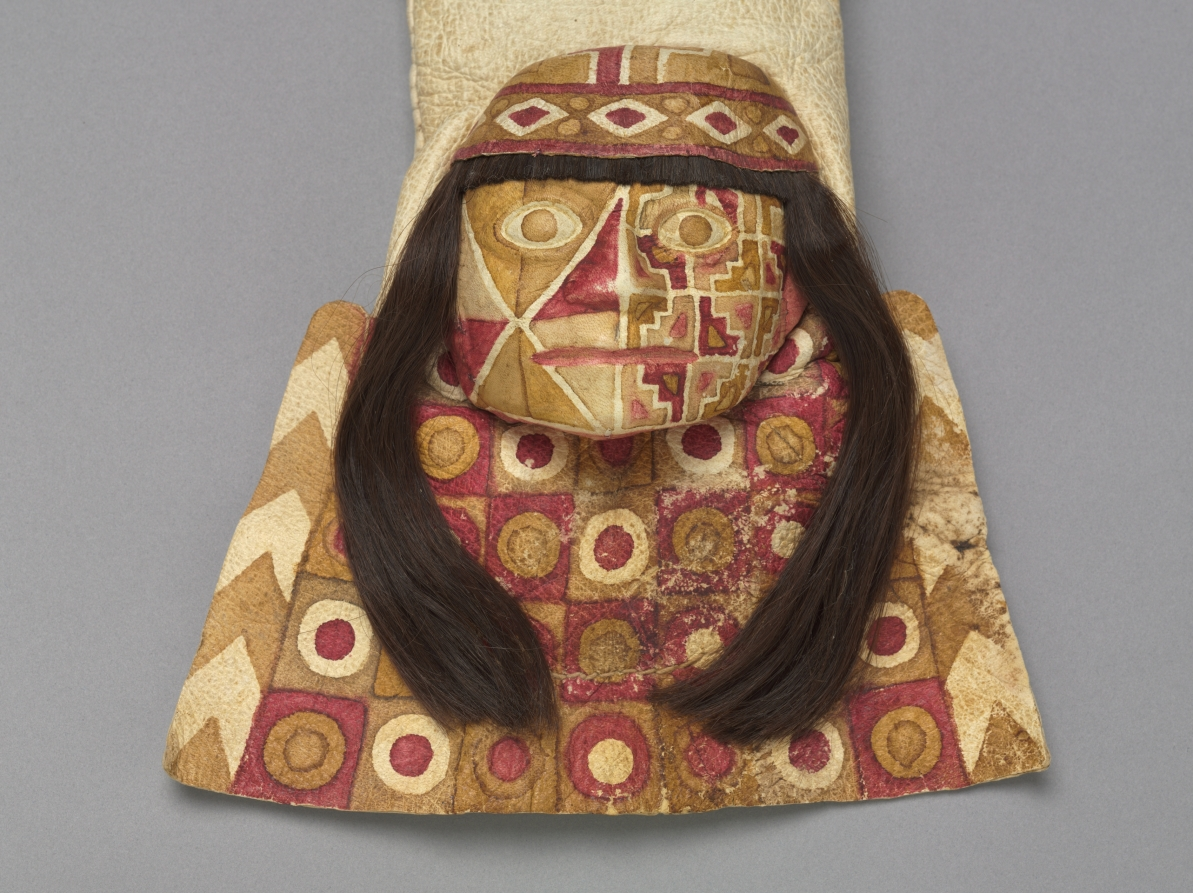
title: Bag with Human Face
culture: Andes, Wari, Middle Horizon, 6th-10th century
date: 600–1000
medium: alpaca or llama hide, human hair, pigment, cotton; coca leaf contents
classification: Mixed Media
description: The face on this bag is decorated with geometric designs that also appear on Wari warrior representations; the circles on the panel beneath the face may refer to an elite tunic made of tie-dyed cloth. The bag was used to carry coca leaves, which in the past and today have important practical and religious purposes in the Andes. Chewing the leaves during physical exertion improves stamina; when used ritually, the leaves initiate communion with cosmic forces.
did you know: This bag was used to carry coca leaves.